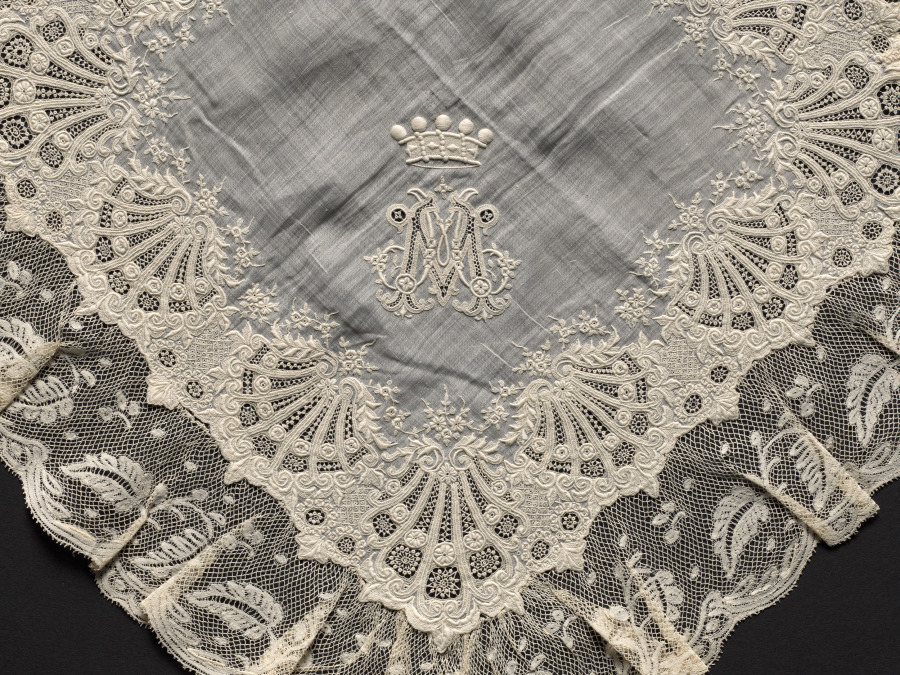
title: Lace Handkerchief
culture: Switzerland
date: 1780–99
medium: Plain weave linen center; bobbin lace (Valenciennes) and embroidered edging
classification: Embroidery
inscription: in one corner, "M.M." with coronet above.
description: In one corner, this handkerchief has a monogram with the initials M. M. There is a coronet above the initials.